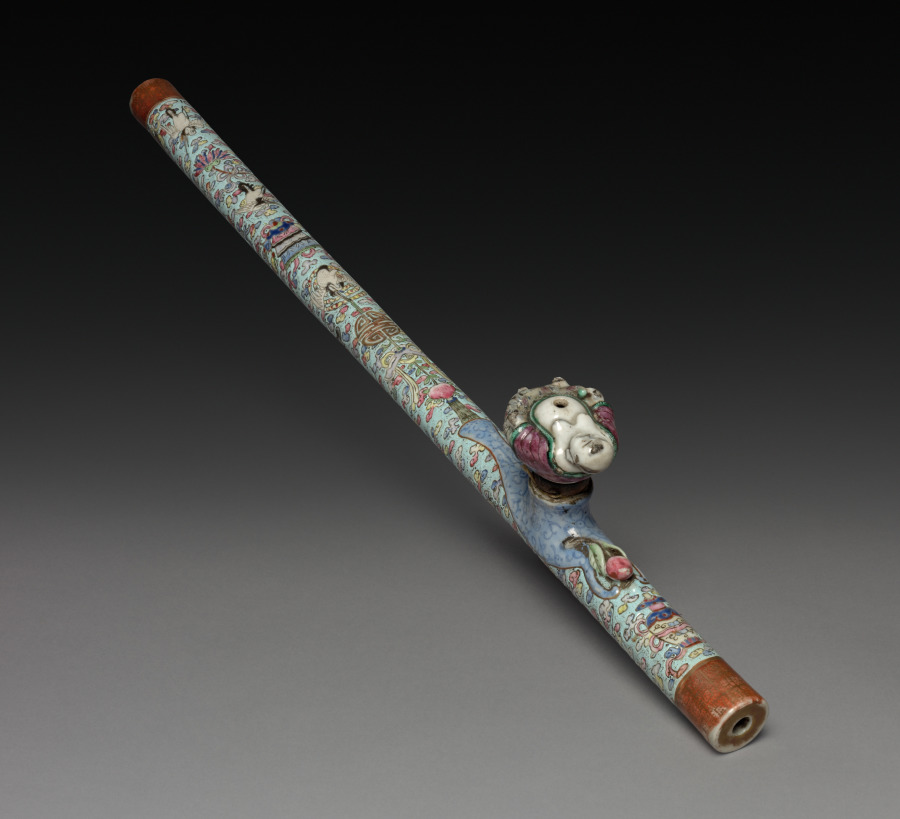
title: Opium Pipe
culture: China, Qing dynasty (1644-1911)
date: 1800s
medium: enamel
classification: Miscellaneous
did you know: The stem of the pipe is decorated with symbols of longevity, while the porcelain bowl is in the shape of a Buddha.